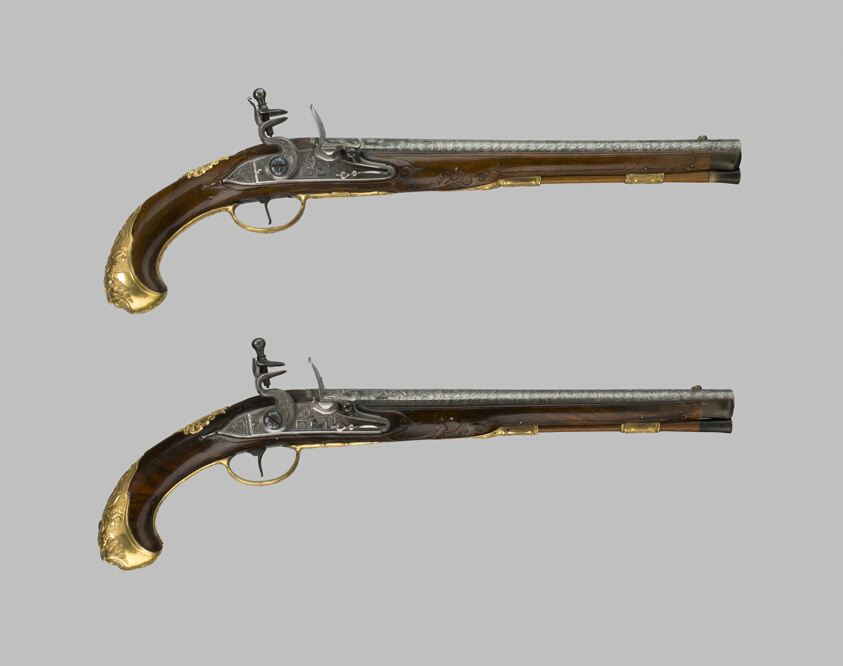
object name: Arms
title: Pair of Flintlock Holster Pistols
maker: Belgian, Liège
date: c. 1720/30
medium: Steel, silver, brass, wood (walnut), and mercury gilding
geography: Liège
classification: firearm-handgun; arms; arms and armor